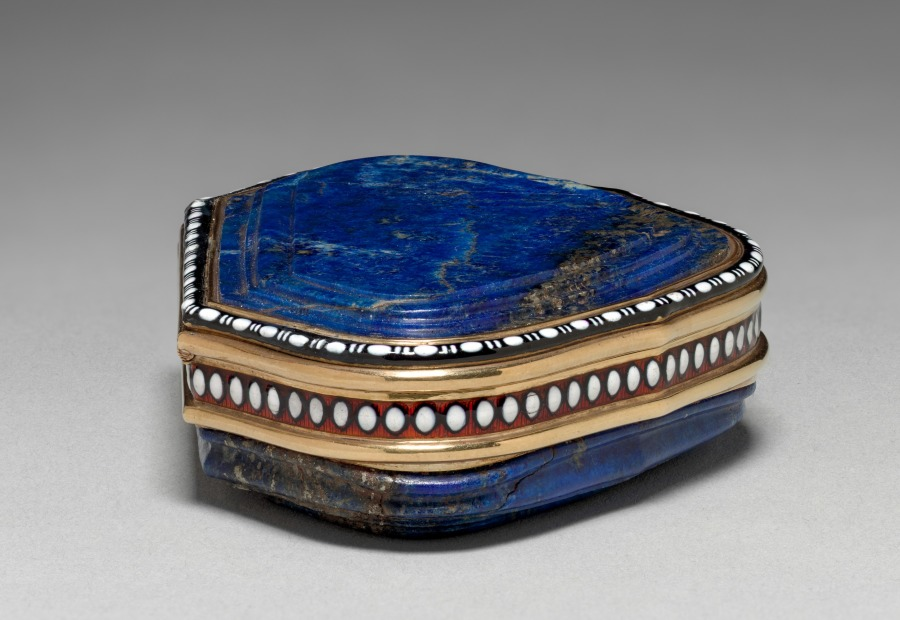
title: Snuff Box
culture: Germany, Dresden (?), mid-18th century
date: mid-1700s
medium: lapis lazuli with enameled gold mounts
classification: Miscellaneous